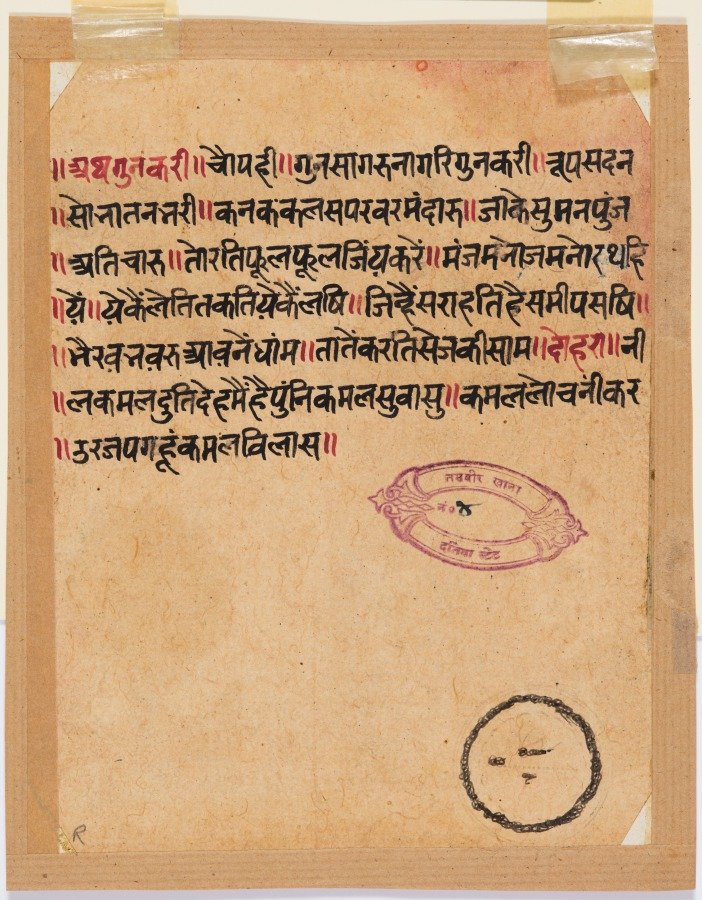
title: Two Women Pluck Flowers on a Terrace: Gunakali Ragini, from a Ragamala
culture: Central India, Madhya Pradesh, Malwa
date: c. 1650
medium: Gum tempera and gold on paper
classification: Painting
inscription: Verso: Gunakari Ragini; Text Stamped, Tasvir Khana, No: 4, Datiya State (Later date), the lower stamp is not visible in the image.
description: A woman with dark complexion and her fair-skinned companion collect flowers in a white bowl from a plant growing in a golden pot. Two huge yellow bolsters set rakishly on the bed suggest restlessness inside the chamber. A gold box for breath-freshening betel (paan) is on the bed, and golden wine vessels are in the two turrets and on the roof, probably to be drunk while watching for her lover to arrive.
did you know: The musical mode Gunakari is performed before sunrise, suggested by the black background.